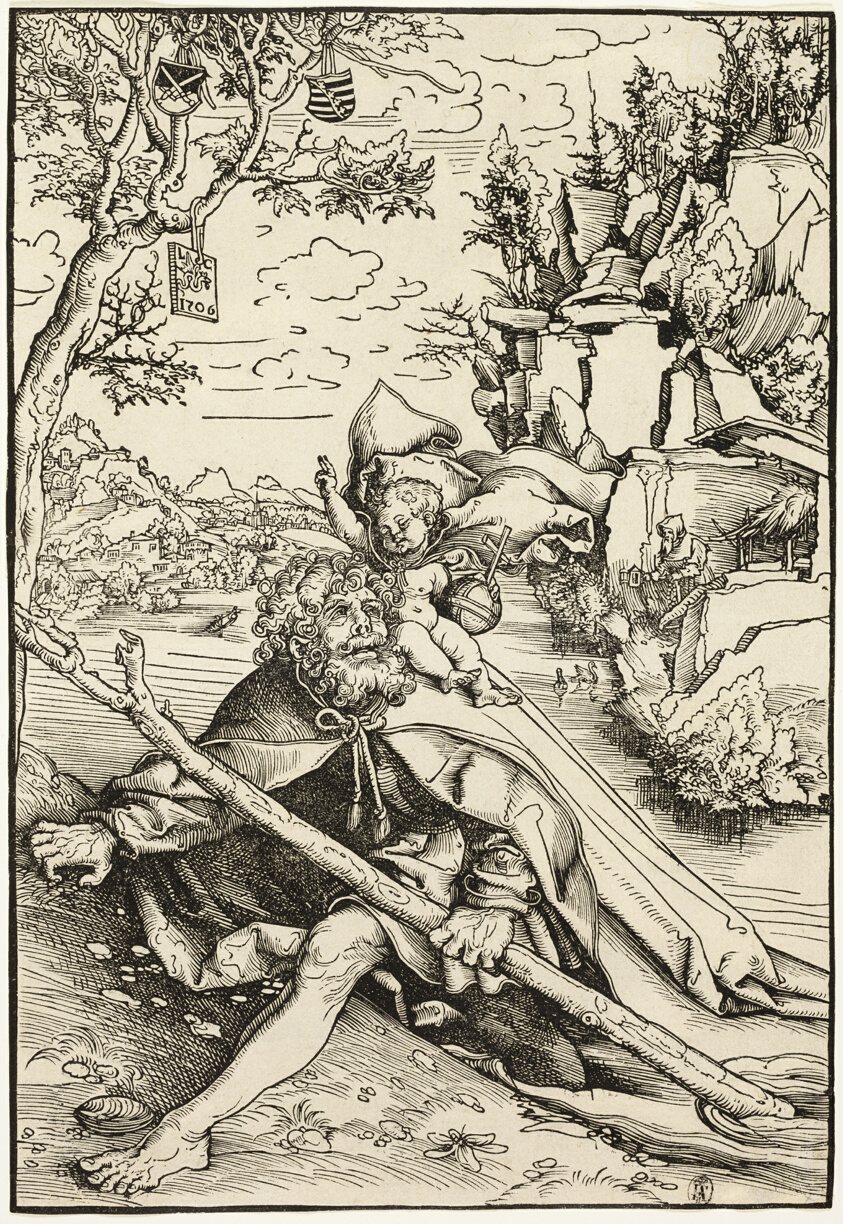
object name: Print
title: Saint Christopher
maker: Lucas Cranach the Elder (German, 1472-1553)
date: 1506, published 1509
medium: Woodcut in black on ivory laid paper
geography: Germany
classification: woodcut; print; prints and drawing